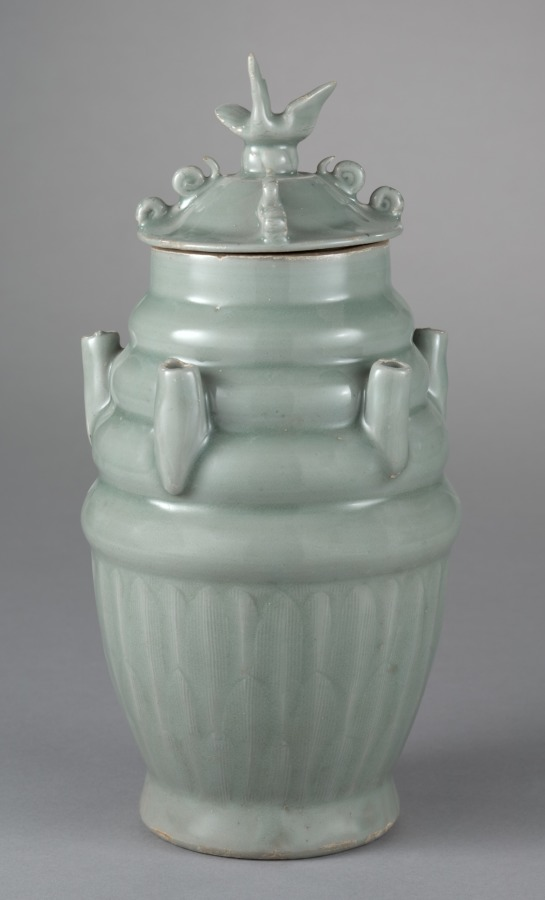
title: Five-Spouted Vase with Cover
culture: China, Zhejiang province, Longquan region, Northern Song dynasty (960-1127)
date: 1000s-1100s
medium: green-glazed porcelaneous stoneware, Longquan ware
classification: Ceramic